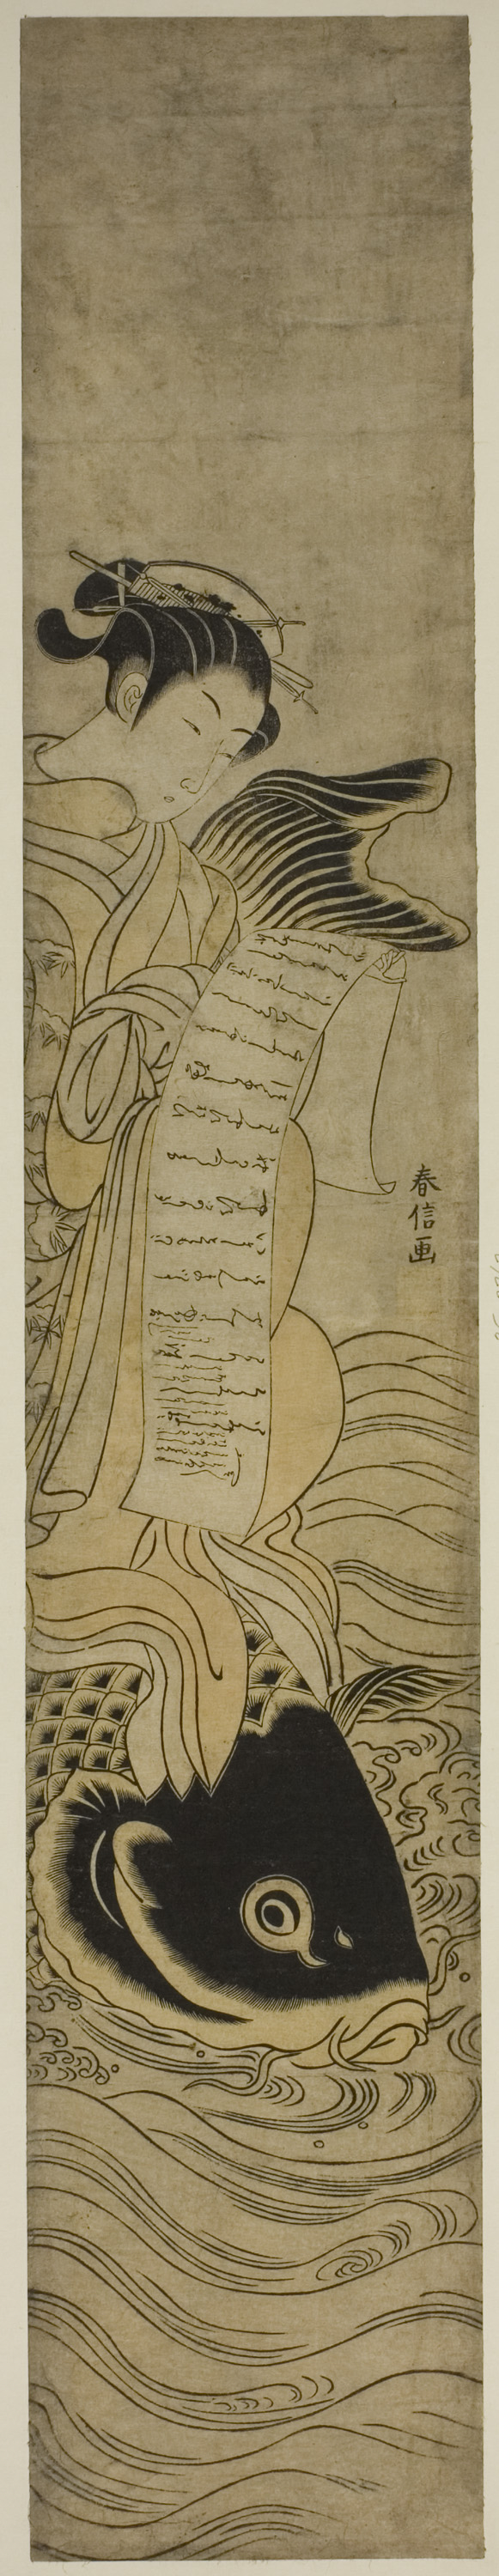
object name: Print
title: Courtesan Riding a Carp (parody of the Daoist Immortal Kinko [Chinese: Qin Gao])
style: Japanese (culture or style)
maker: Suzuki Harunobu 鈴木 春信; Japanese, 1725 (?)-1770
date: c. 1768/69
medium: Color woodblock print; hashira-e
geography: Japan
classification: woodblock print; print; asian art